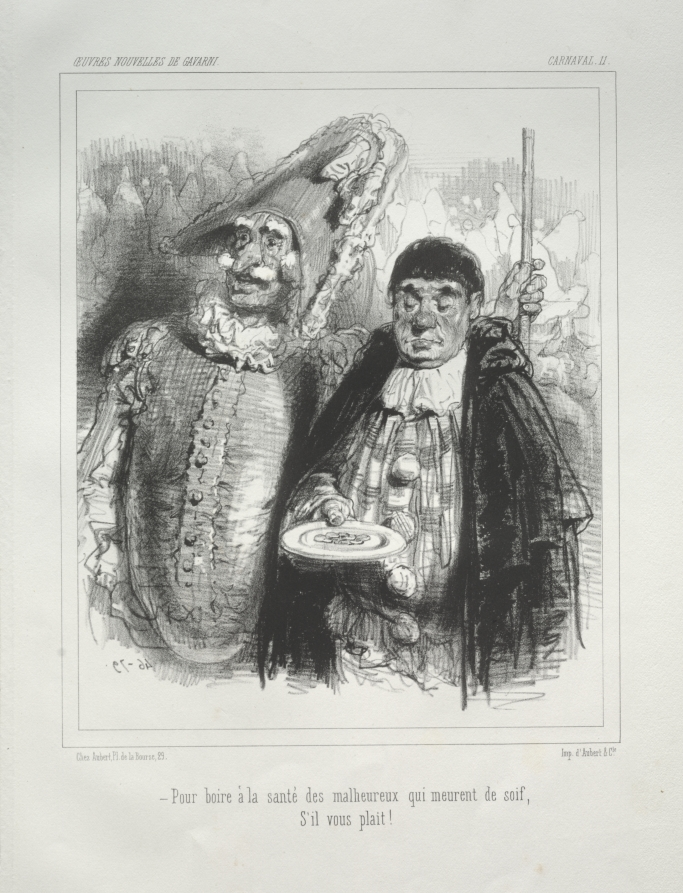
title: Carnaval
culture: France, 19th century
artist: Paul Gavarni (French, 1804–1866)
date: c. 1841–47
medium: lithograph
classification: Print